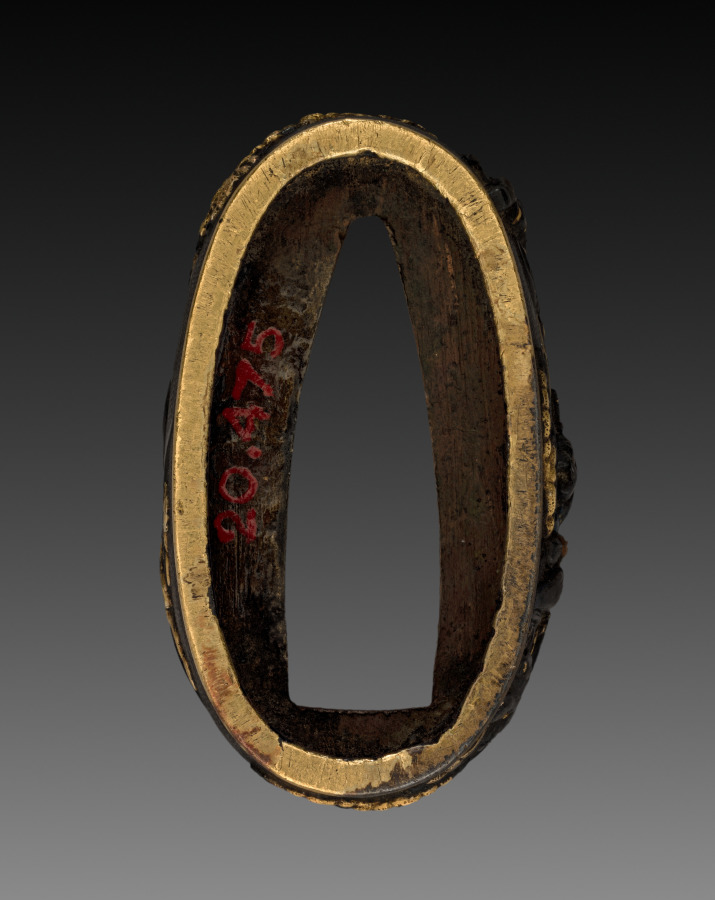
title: Sword-Hilt Collar (Fuchi)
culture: Japan, Edo period (1615–1868)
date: 1700–1850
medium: shakudo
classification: Arms and Armor